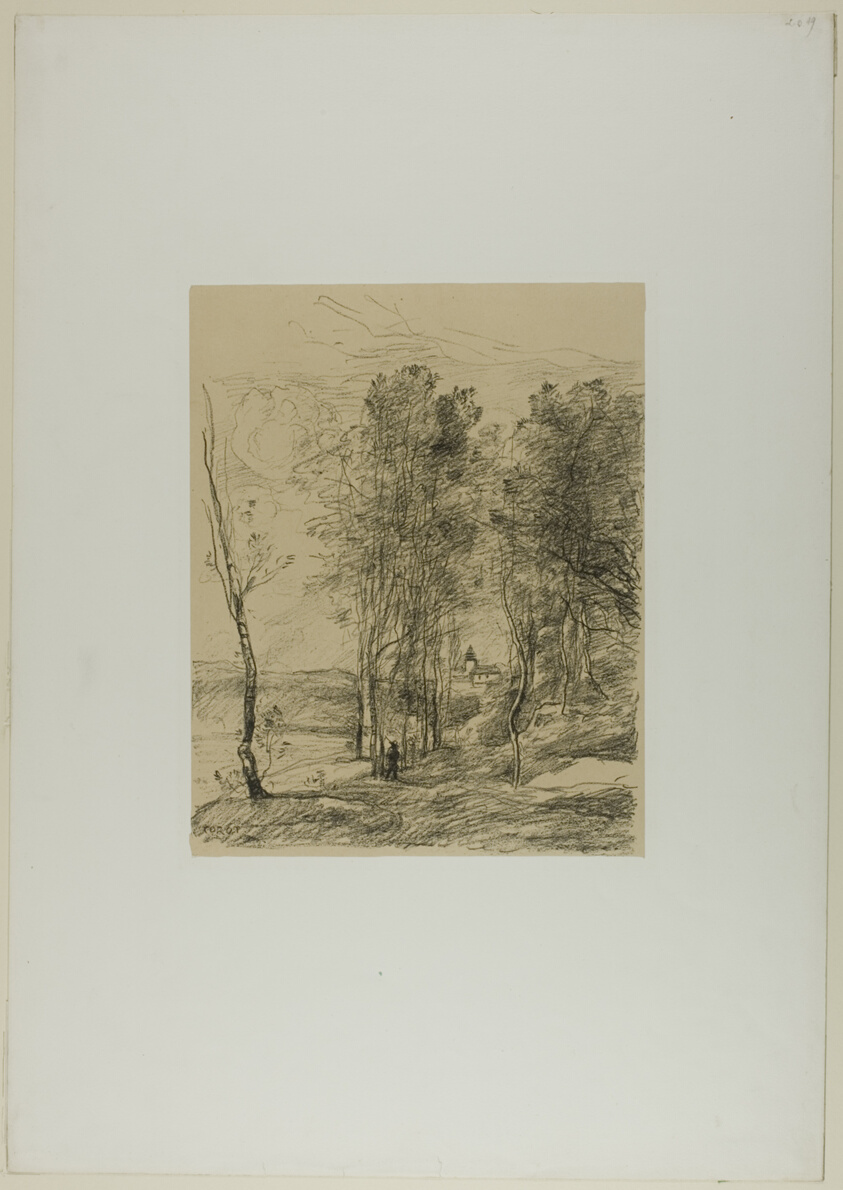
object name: Print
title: The Bell Tower of St. Nicolas-lez-Arras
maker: Jean-Baptiste-Camille Corot; French, 1796-1875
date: 1871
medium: Transfer lithograph on tan China paper laid down on white wove paper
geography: France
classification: lithograph; print; prints and drawing